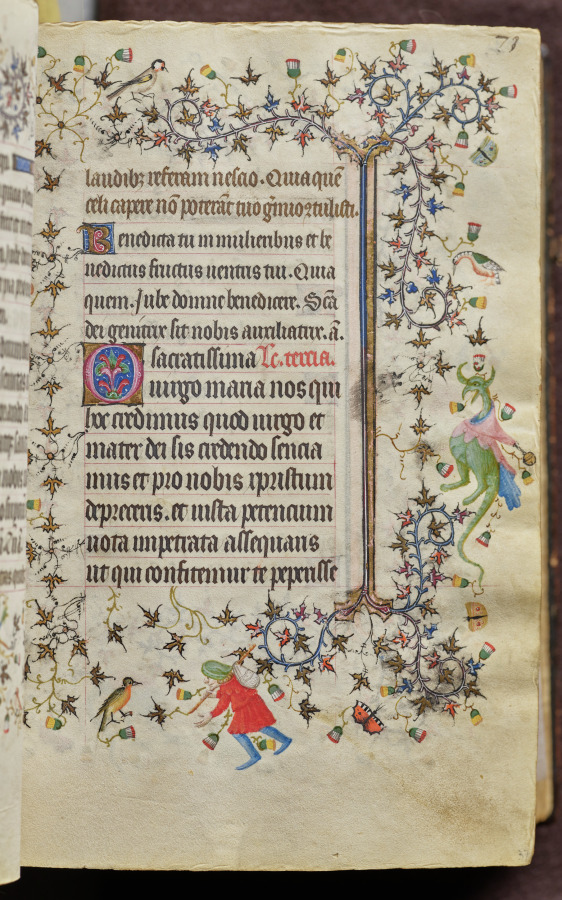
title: Hours of Charles the Noble, King of Navarre (1361-1425): fol. 37r, Text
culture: France, Paris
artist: Master of the Brussels Initials and Associates (French)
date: c. 1405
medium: ink, tempera, and gold on vellum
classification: Bound Volume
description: This precious volume was obviously highly prized by its owner, the French-born King of Navarre, who had his coat of arms painted on no less than twenty folios. Rather than directly commissioning this manuscript from a specific workshop, it seems that Charles the Noble acquired his book of hours -- perhaps ready-made for the luxury market -- while on a trip to Paris in 1404-05. A collaborative effort, six painting styles are evidenced within the pages of this codex, those of two Italians, two Frenchmen, and two Netherlanders. The painter who was responsible for the planning and decoration of the book, and who produced seventeen of the large miniatures, was a Bolognese artist known as the Master of the Brussels Initials. His principal assistant, responsible for most of the borders, was a Florentine who signed his name "Zecho" da Firenze on folio 208 verso.